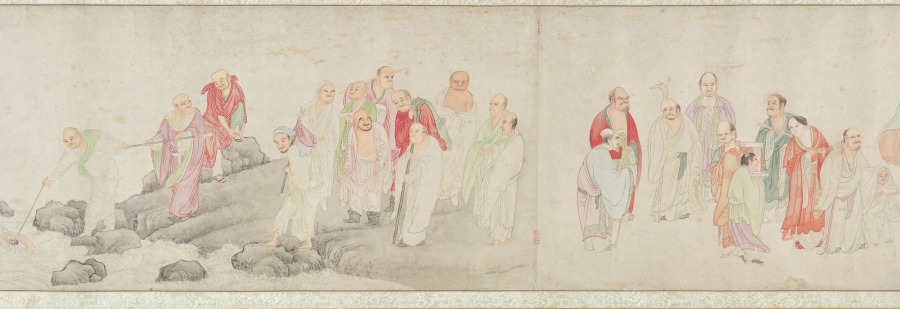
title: The Five Hundred Arhats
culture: China, Ming dynasty (1368–1644)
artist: Wu Bin (Chinese, active c. 1591–1626)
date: 1591–1626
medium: Handscroll; ink and color on paper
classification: Painting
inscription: 枝隱頭陀吳彬齋心拜寫 [印]吳彬之印; 文中父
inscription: 7 seals of Qianlong emperor (r. 1736–95): Gu xi tian zi 古希天子; Shou 壽; Qianlong jian shang 乾隆鑑賞; San xi tang jing jian xi 三希堂精鑑璽; Yi zi sun 宜子孫; Tai shang huang di zhi bao 太上皇帝之寳; Qian qing gong bao 乾清宮寶.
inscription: 6 seals of Cheng Qi 程琦 (1911–1988): Ke an geng zi wu shi yi hou suo de ming ji 可菴庚子五十以後所得名跡; 5 other Cheng Qi seals.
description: More than 66 feet long, this handscroll depicts 447 luohans, 72 attendants, and the bodhisattva of compassion at its very end. Luohans (arhats in Sanskrit), disciples of the Buddha and protectors of the Buddha’s law, possess supernatural powers and take on myriad external appearances. The amusing assortment of characters are engaged in an array of religious, secular, and miraculous activities. The painter used stylistic features borrowed from earlier artists, carefully controlled lines, and refined coloring. Wu Bin was a lay Buddhist and depicting this sort of image was part of a religious practice seeking understanding of the Buddha’s teaching.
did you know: Far advanced on the path to enlightenment, arhats have the capacity to tame tigers, free dragons, and to float on water or in the air.